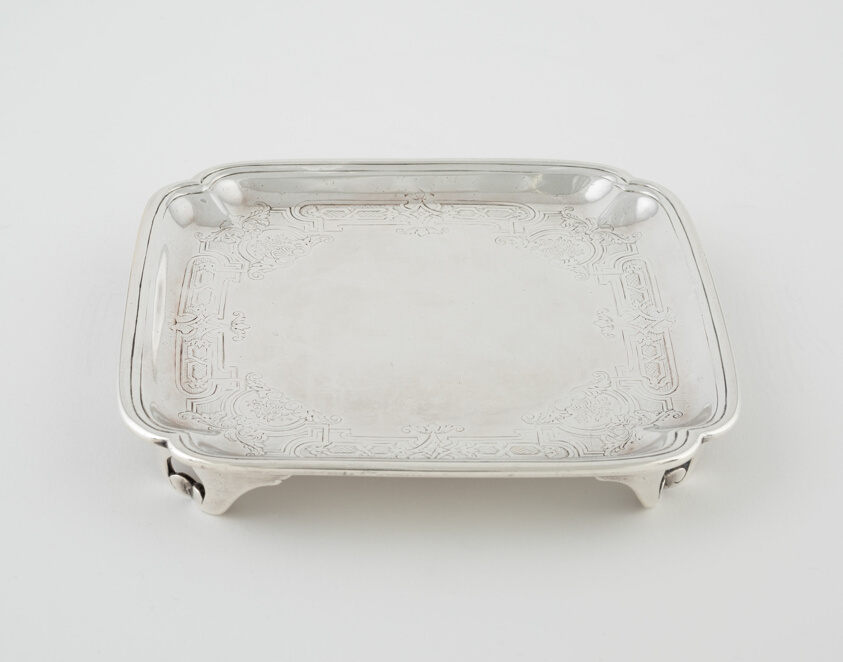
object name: Metalwork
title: Waiter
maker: Isaac Liger; English, active 1720; London, England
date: 1723/24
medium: Silver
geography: London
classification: silver; metalwork; european decorative arts